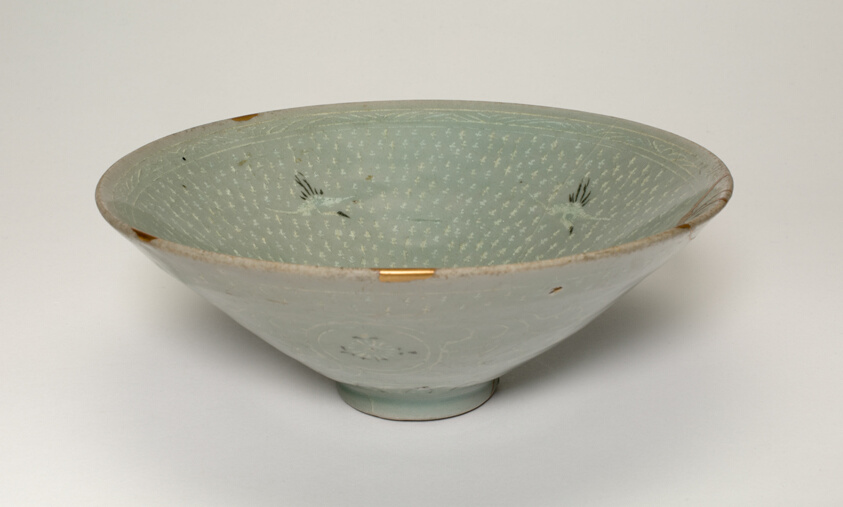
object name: Decorative Arts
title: Bowl with Crane, Clouds,and Chrysanthemum Motifs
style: Korean (culture or style)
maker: Korea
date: Goryeo dynasty (918–1392), late 14th century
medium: Stoneware with red and white slip and celadon glaze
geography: Korea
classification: bowl; dish (vessel); asian art; ceramics; decorative arts